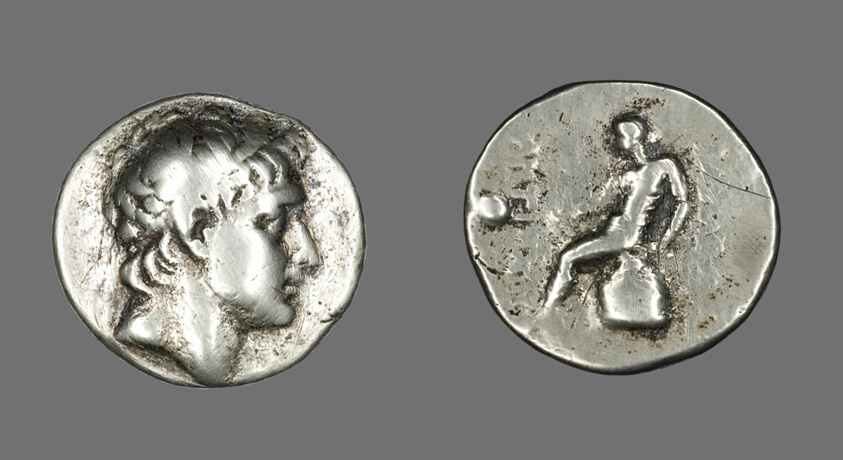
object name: Coin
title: Tetradrachm (Coin) Portraying Antiochus I, II or III (?)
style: greek, ancient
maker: Greek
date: 3rd-2nd century BCE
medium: Silver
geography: Syria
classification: coin; ancient art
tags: mythological figures, deities